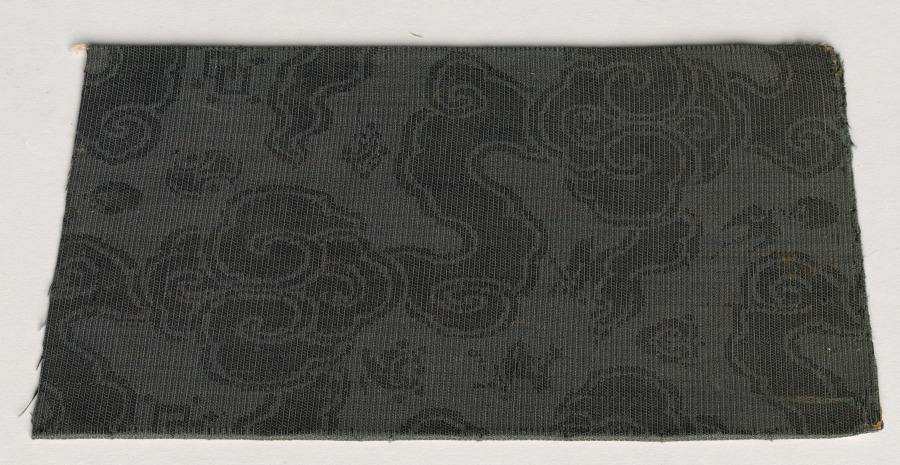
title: Book Cover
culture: China, 19th century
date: 1800s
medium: silk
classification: Textile